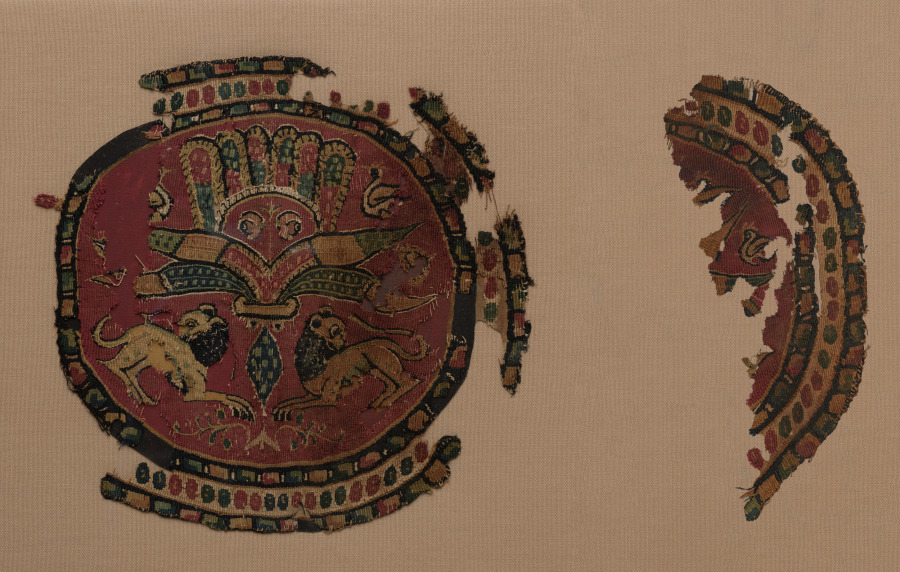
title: Lions from a Tunic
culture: Egypt, Islamic Abbasid period, 8th - 9th Century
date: c. 800s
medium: tapestry weave with supplementary weft wrapping; undyed linen and dyed wool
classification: Textile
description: The royal lions and jeweled border in this colorful roundel, originally from a tunic, conveyed power and wealth. The symmetrical design with lions and ducks flanking the central palmette (fan-shaped plant form) indicates that the pattern was copied from a costlier silk textile woven on a loom that automatically repeated the design in mirror-image symmetry.